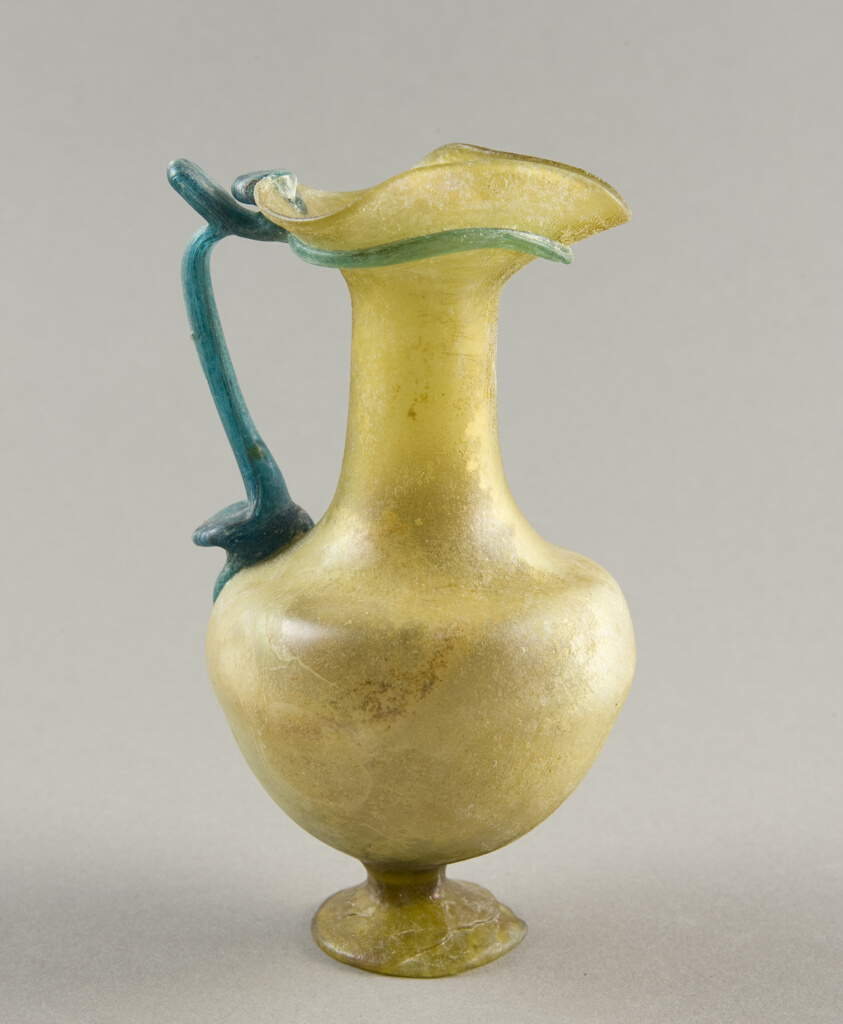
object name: Vessel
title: Pitcher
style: syrian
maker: Roman; Levant or Syria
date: 3rd-4th century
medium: Glass, blown technique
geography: Syria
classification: glass; vessel; ancient art